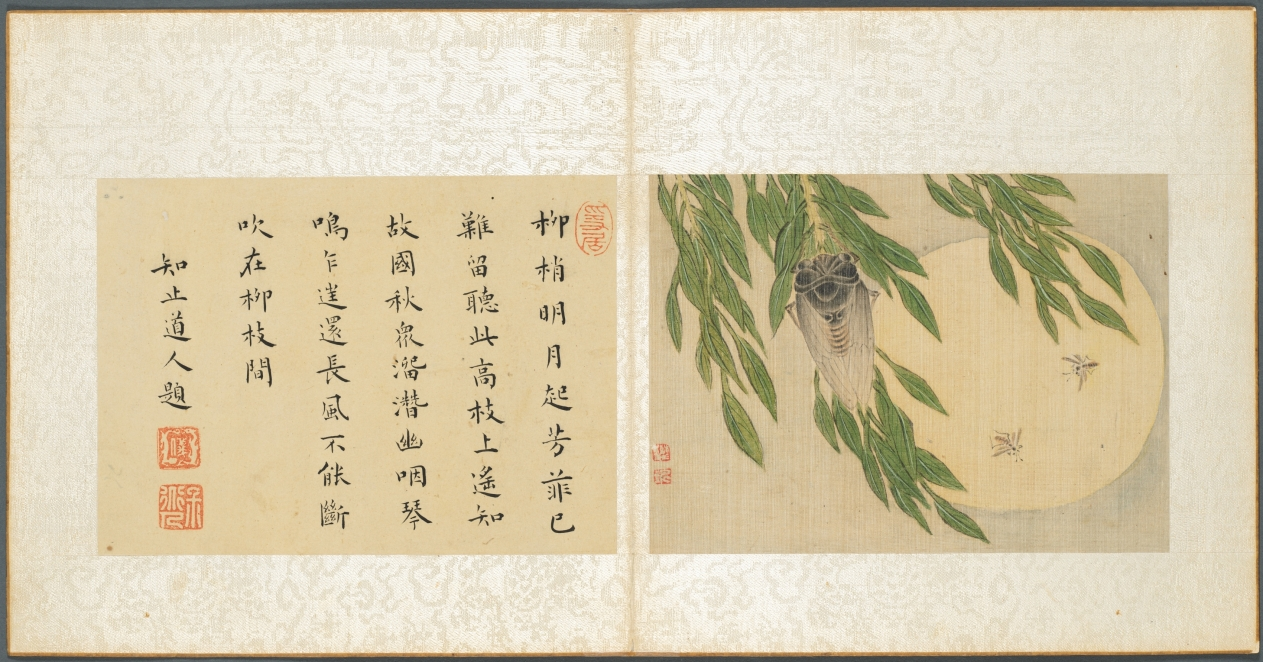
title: Album of Miscellaneous Subjects, Leaf 6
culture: China, Qing dynasty (1644-1911)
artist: Fan Qi (Chinese, 1616–after 1694)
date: early 1650s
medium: album leaf, ink and color on silk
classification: Painting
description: Zhou Yi's calligraphy is across from the painting on leaf six. His colophon reads: The bright moon emerges through the willow, The fragrance of flowers is already difficult to retain. Listening above these tall branches, I sense that faraway in my native place autumn has arrived. Obstructed, all the diminished waters flow, Abruptly the sound of a lute wafts to and fro. A strong wind, unabated, blows among the willow branches.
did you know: A cicada clings to a willow branch while two bees fly in the moonlight .